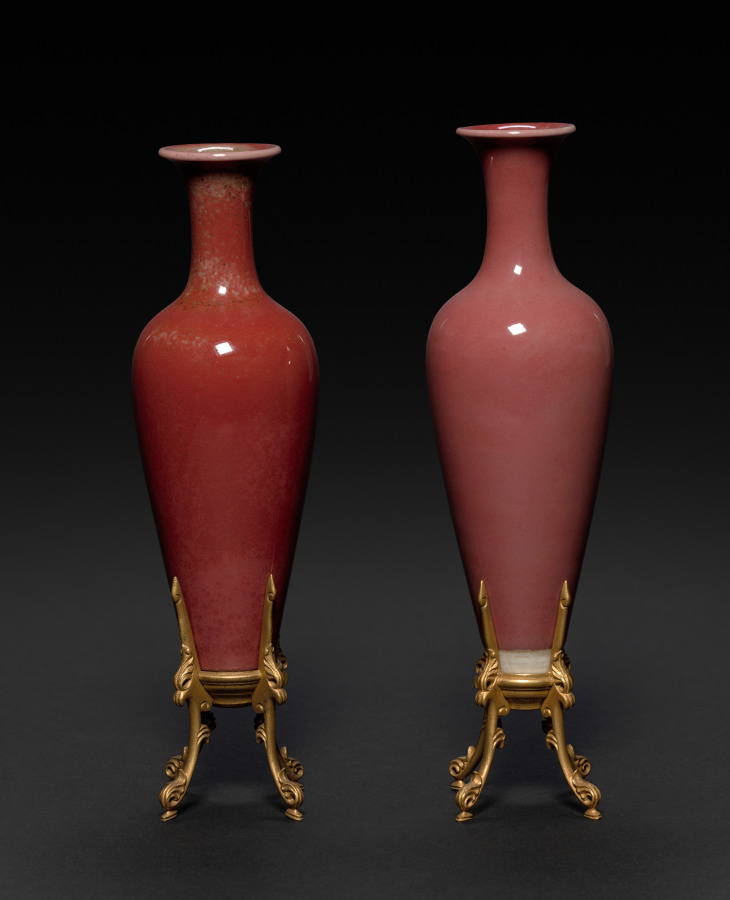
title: Pair of Bottles with Peach Bloom Glaze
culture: China, Qing dynasty (1644-1911), Kangxi reign (1661-1722)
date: 1662–1722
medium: porcelain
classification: Ceramic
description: The "peach-bloom" glaze developed during the Kangxi era has also been described as "drunken with beauty." Technical achievements were transcended with aesthetic associations, revealing the greatest sensitivity to all things beautiful in nature.